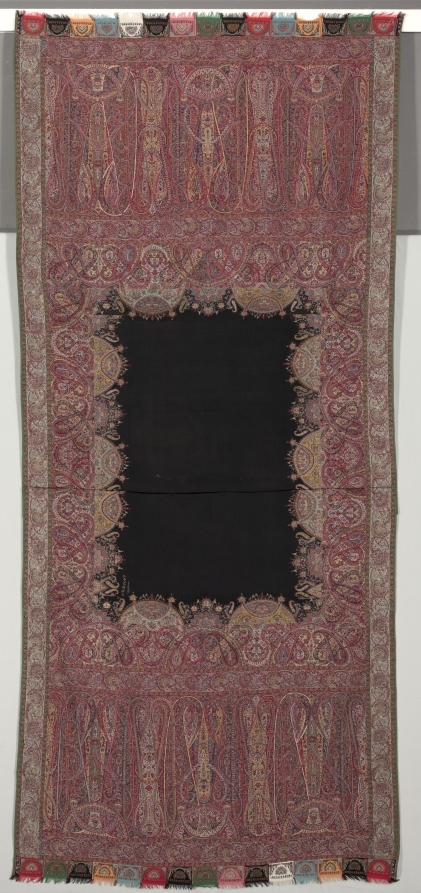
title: Long Shawl with Black Center and Exotic Four-Sided Gallery in Chinoiserie Style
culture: India, Kashmir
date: 1840s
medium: wool; 2/2 twill tapestry (S), double interlocked, pieced, refreshed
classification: Textile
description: This expensive woven shawl has been refreshed—that is, its outdated designs have been replaced with beautiful new decoration. Overlapping pairs of botehs, or paisleys, enliven the original end panels (pallava) whereas the area around the central black rectangle was updated with an exotic four-sided gallery featuring ships, buildings, and flags that suggest Chinese influence. This stunning shawl is composed of seven almost invisibly joined pieces. One large section contains both ends and the continuous side borders while six pieces create the space in the middle. When the shawl was refreshed with the new chic gallery, black pigment—hardly visible—was applied along the edges of the central black section. The inscription may identify the textile’s quality or material content.